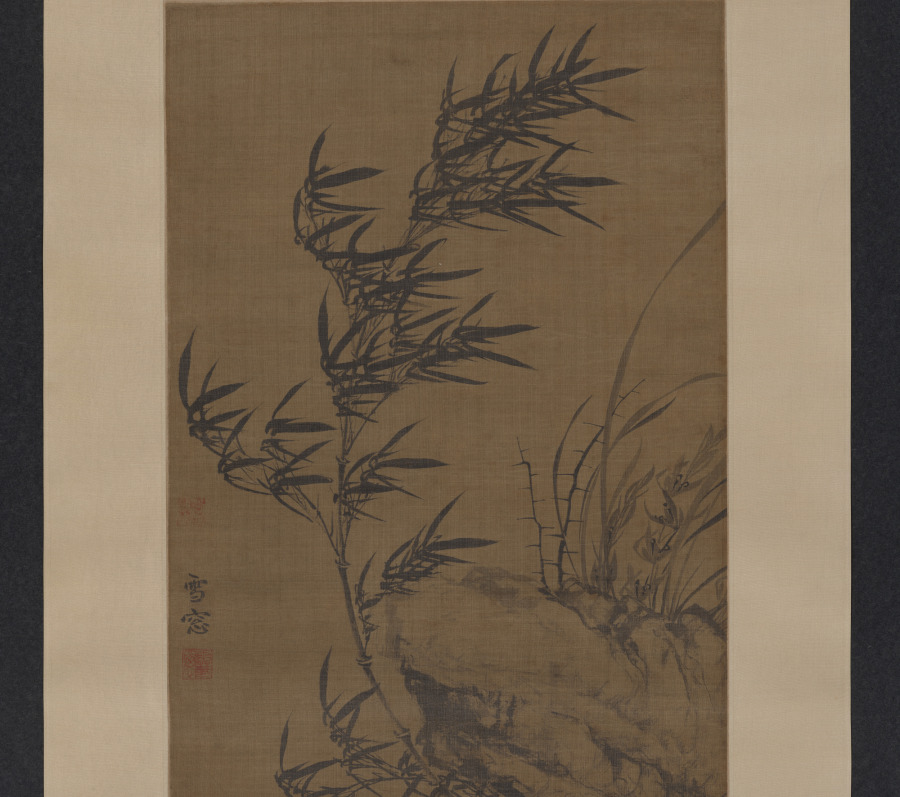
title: Bamboo in the Wind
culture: China, Yuan dynasty (1271-1368)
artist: Puming (Xuechuang) (Chinese, active before 1274-after 1329)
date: 1300s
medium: Hanging scroll; ink on silk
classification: Painting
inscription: Artist's signature and 2 seals, all reading: Xuechuang 雪窓.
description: Bamboo is an evergreen plant that does not break under the weight of snow or the force of the wind, and thus became a favorite motif in literati painting and Chan Buddhism as a metaphor for the virtue of not yielding to worldly temptations. Xuechuang, also known as monk Puming, was a native of Songjiang, near Shanghai, who spent his life as a monk in Suzhou. In 1338, he presided over Yunyan temple on Tiger Hill. Here, he masterfully depicts a bamboo gently bent in a subtle breeze. Puming’s paintings were revered in Japan and Korea.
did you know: Bamboo, pine, and plum, often referred to as the "three friends of winter," are popular motifs in Chinese literati art.